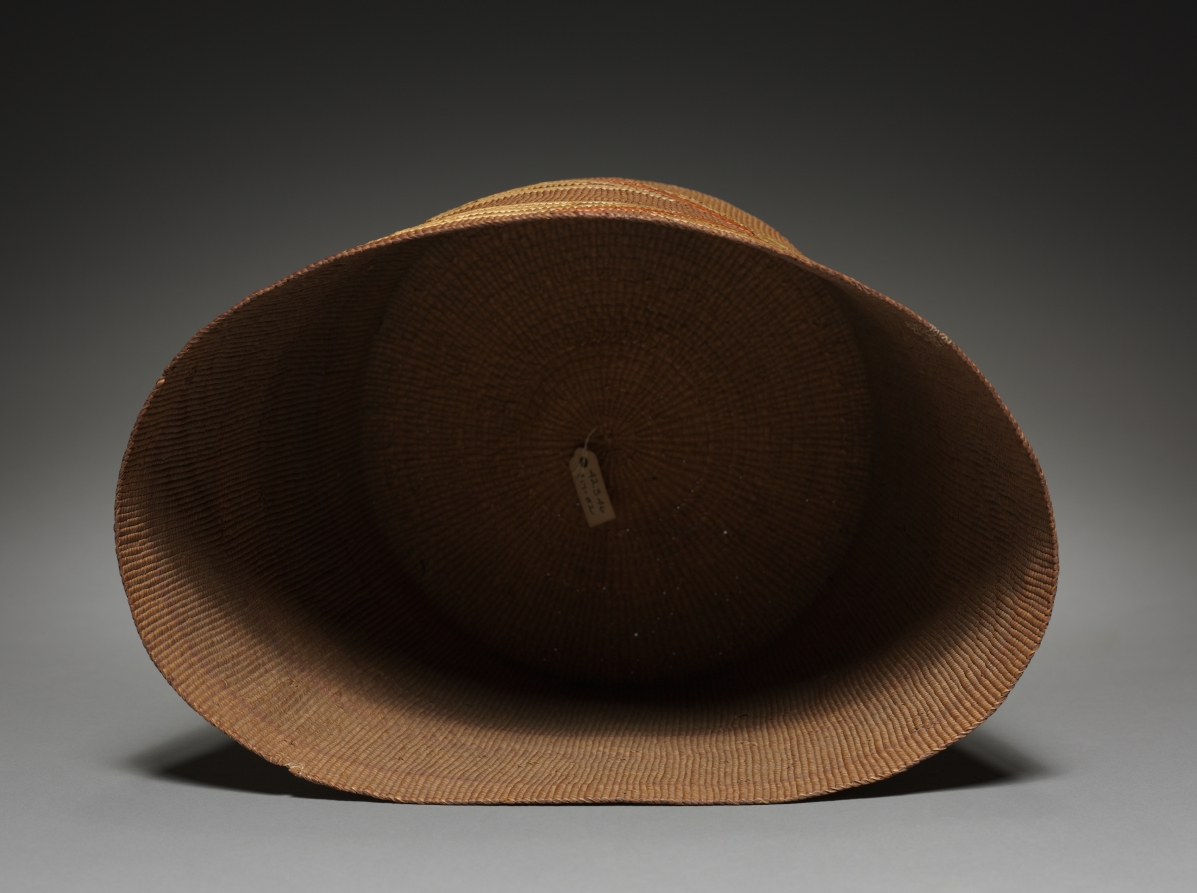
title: Bowl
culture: Northwest Coast, Tlingit, 20th century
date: before 1942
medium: twined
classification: Basketry